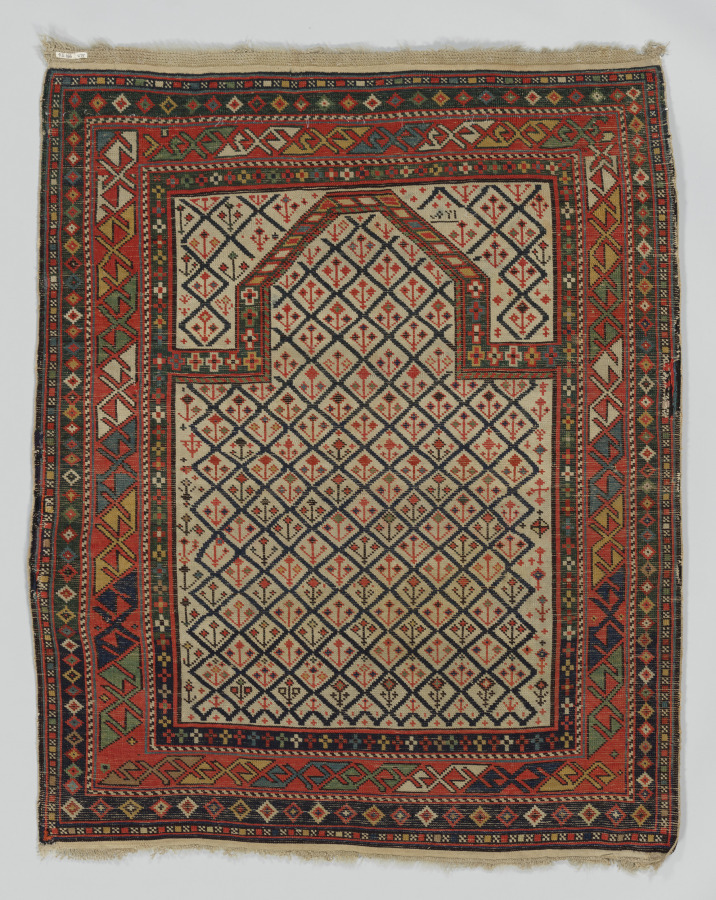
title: Prayer Rug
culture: Caucasus, Daghestan, 19th century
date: c. 1800s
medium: wool and linen; ghiordes knot, extended tabby, fringe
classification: Carpet